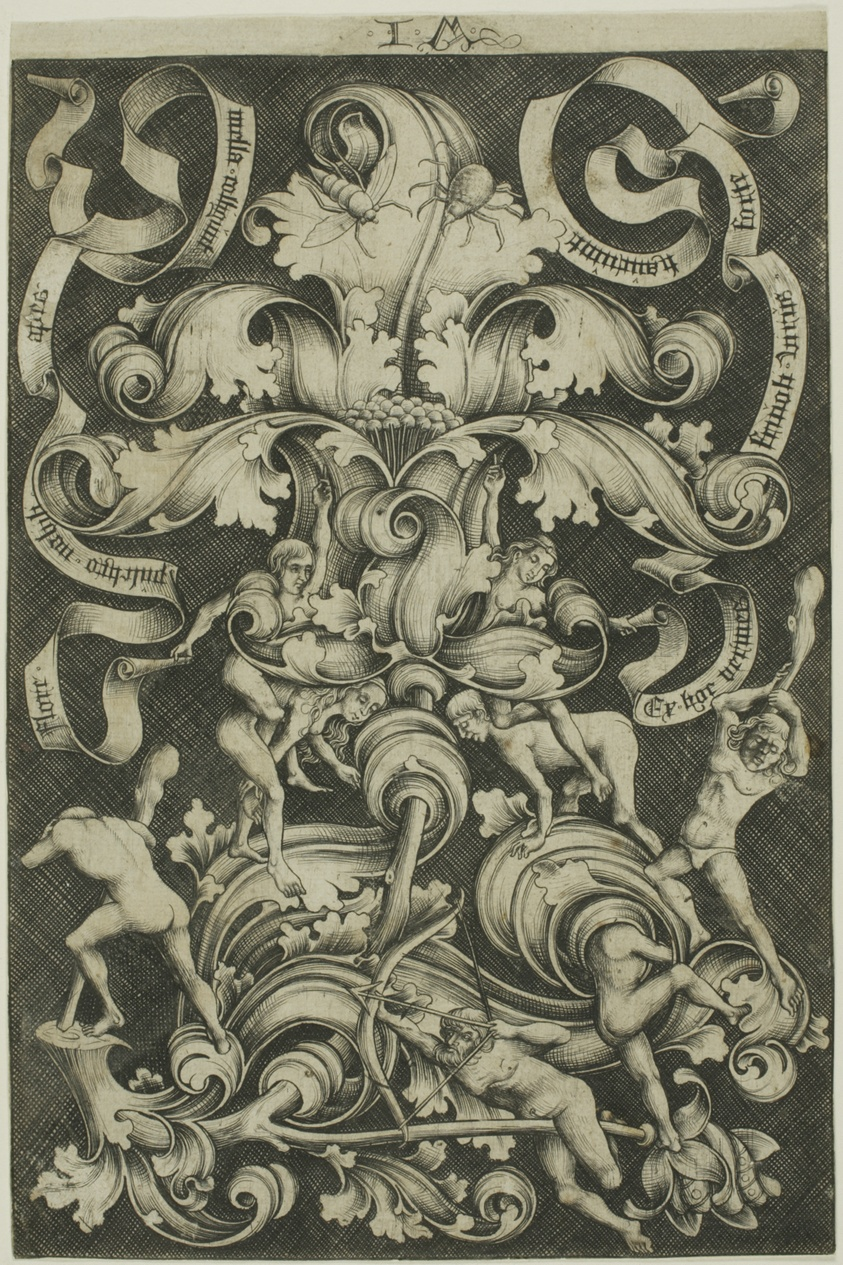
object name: Print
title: Ornament With Flower and Eight Wild Folk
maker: Israhel van Meckenem the Younger; German, c. 1440/45-1503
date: 1490/1500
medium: Engraving in black on cream laid paper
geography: Germany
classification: engraving; print; prints and drawing